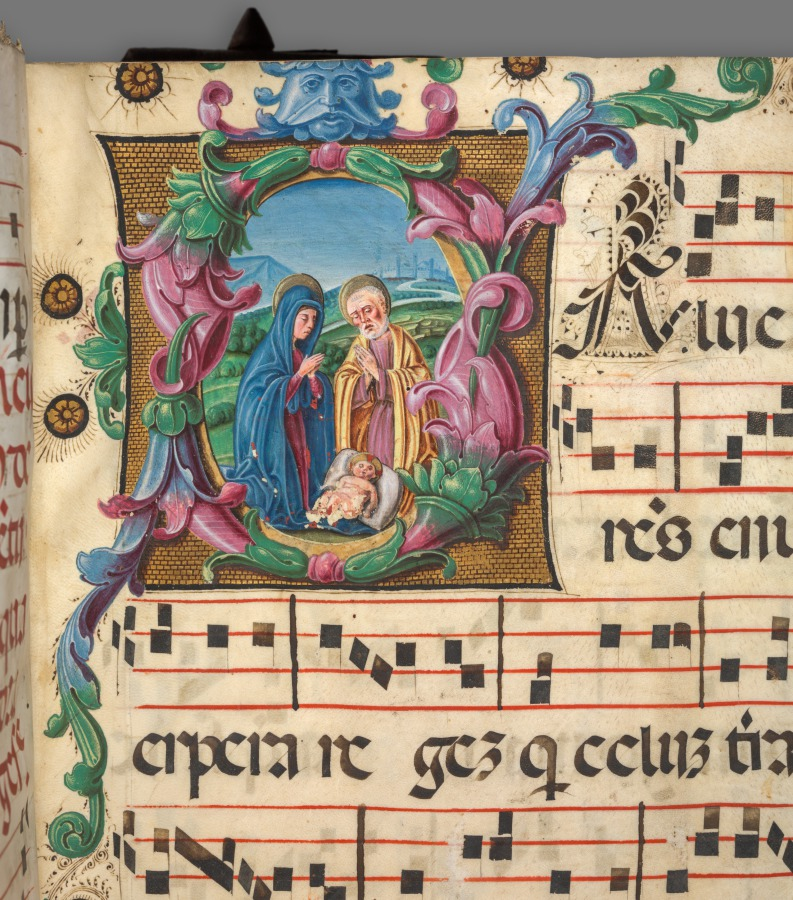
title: Gradual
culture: Italy, Verona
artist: circle of Girolamo dai Libri (Italian, 1474–1555)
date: c. 1520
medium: ink, tempera, and gold on parchment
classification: Manuscript